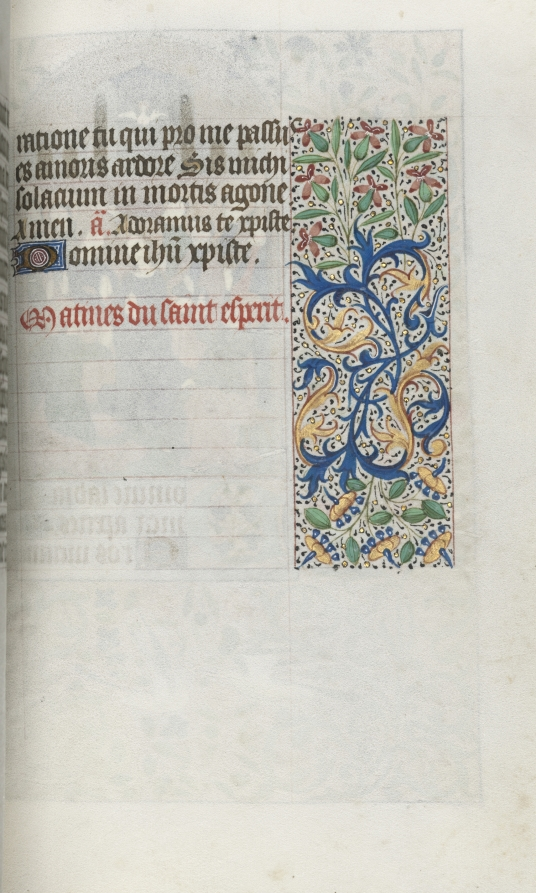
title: Book of Hours (Use of Rouen): fol. 99r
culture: France, Rouen, 15th century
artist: Master of the Geneva Latini (French, active Rouen, 1460–80)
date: c. 1470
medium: ink, tempera, and gold on vellum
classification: Bound Volume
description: In the late 1400s and early 1500s Rouen was an established and important center of book production. The city’s cathedral had a wealthy chapter that spent large sums of money to commission books and to maintain its extensive library. The stationers and booksellers would have likely been concentrated in or near the cathedral precinct. This artist, named after a manuscript now in Geneva, was Rouen’s principal illuminator during the second half of the 1400s.